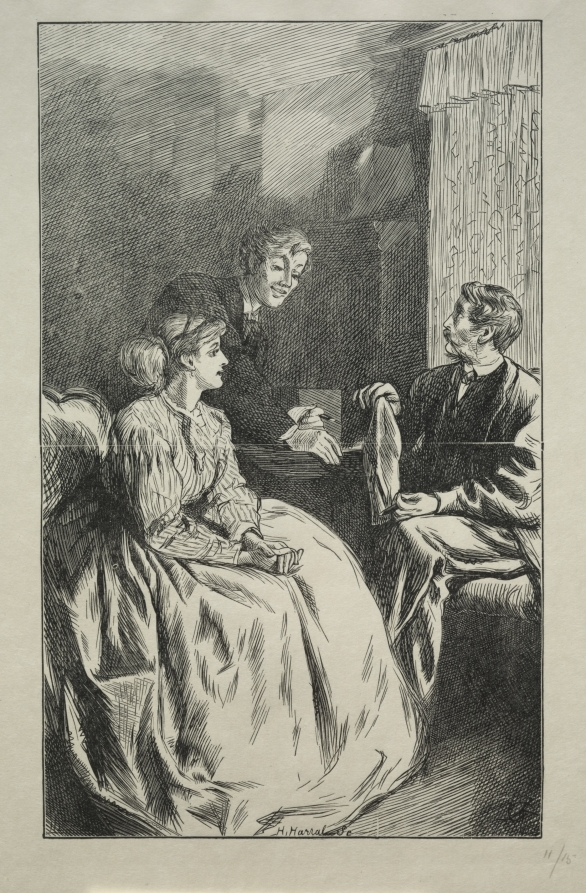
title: How I Lost My Whiskers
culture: England, 19th century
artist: Horace Harral (British, 1817–1905)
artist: after Charles Samuel Keene (British, 1823–1891)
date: 1866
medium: wood engraving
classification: Print